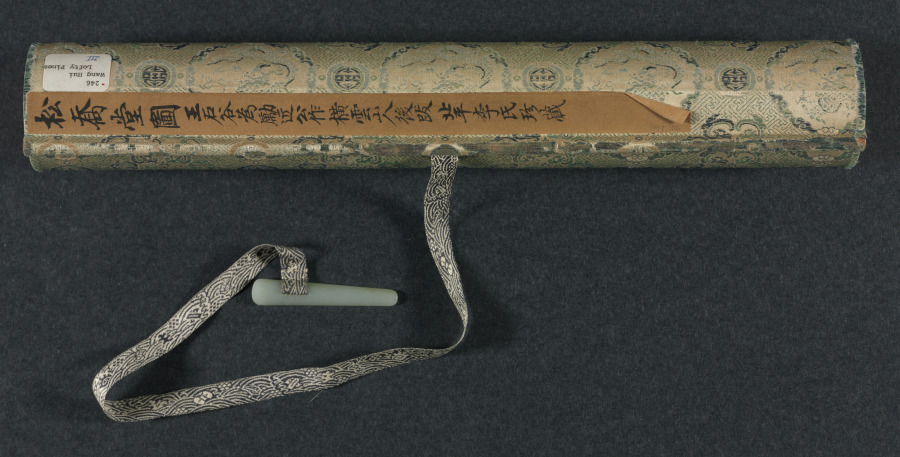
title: Hall of Lofty Pines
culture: China, Qing dynasty (1644-1911)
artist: Wang Hui (Chinese, 1632–1717)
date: 1703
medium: handscroll; ink and color on paper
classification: Painting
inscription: [題] 松喬堂圖 康熙癸未夏六月, 海虞耕煙散人王翬畫。[印]王翬之印; 石谷. [左下] 來青閣; 耕煙野老時年七十有二.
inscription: 松喬堂圖一卷，海虞石谷王君為靜海近公厲少司冦公作也。圖成于癸未之夏。未幾而公遂仙去。公令子今編修君南湖屬余題跋其後。余與公同官侍從，交契最深。側見公之清修純德，蔚為聖天子所眷重。侍直內廷，密勿贊襄，幾二十餘年。蒼生之所以受賜，士林之所以沐德者，天下莫能窺，在廷莫能悉。而公卒不言。以故宸衷日益契，恩禮亦日益渥。雖年逾懸車，時有歸老之念。而上固不聼公之去。其所謂松喬堂者，御書以賜公者也。蓋以松比公之清風勁節，而歲寒不改，經霜彌茂。則又以期公之壽考未有艾焉。公知此身未易乞，而山林槃磵之樂，止可寄諸寤思。此松喬堂圖之所由作也歟。石谷此圖，結構精密，筆墨超邁。其寫樹木之蒼蔚，堂宇之靚幽。恍見摩詰輞川樂天廬山之勝。獨惜公未得一日徜徉故園以償其願。即繪於圖亦未得以永其趣，此編修君之所以眷眷不忘也。雖然千歳之松喬，下蔭百畝，上以修棟梁之需。然則上當日名堂之意，不更望於後之人襲其芘而養其材也哉。吾願編修君之寶斯圖。并望君之塗塈丹雘，大其堂構也已矣。 康熈丙戍重陽三日，雲間王鴻緒跋。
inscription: 10 additional seals: 1 seal of Li Duna 勵杜納 (1628–1703); 4 seals of Zha Ying 查瑩 (jinshi of 1766); 5 seals of Li Yun (dates unknown).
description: Wang Hui 王翬, a leading painter in the orthodox school of the early Qing dynasty (1644–1911), was commissioned to paint this landscape with a country estate for Li Duna 勵杜納 (1628–1703), vice minister of justice in Emperor Kangxi’s court. The emperor had honored Li by granting him a piece of calligraphy with the name of Li’s retirement retreat, “Hall of Lofty Pines.” He drew a comparison between pines and Li’s upright character, resilience, and longevity. Wang Hui’s painting was supposed to allow Li to imagine living in a beautiful, secluded compound among the hills and pines. Sadly, Li died before seeing the completed painting and before receiving the emperor’s permission to retire. The landscape begins with peaceful riverbanks and low hills. The pines around the estate in the middle of the handscroll are truly lofty, some stretching even beyond the frame of the painting. Li Duna, the estate’s owner, is shown twice in his serene mountain retreat: first approaching the entrance to the compound with two servants at the right, and then later in the scroll, to the left, reading in the comfort of an inner room.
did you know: One servant carries the estate owner's carefully wrapped qin, a type of zither.